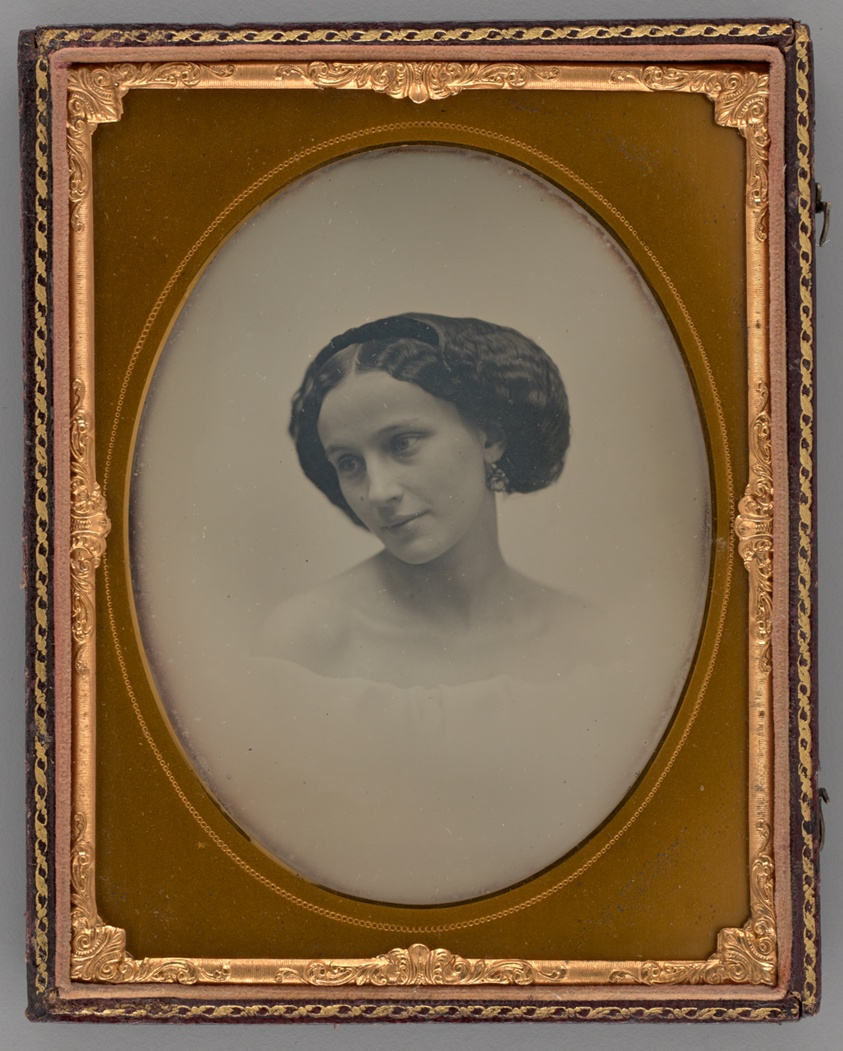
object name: Photograph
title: Untitled (Portrait of a Woman)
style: 19th century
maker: Albert Sands Southworth (American, 1811-1894); and Josiah Johnson Hawes (American, 1808-1901)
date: 1850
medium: Daguerreotype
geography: United States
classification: portrait; photograph; photographic process; photography; portrait; daguerreotype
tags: lundberg collection, portraits, portraits: female subject